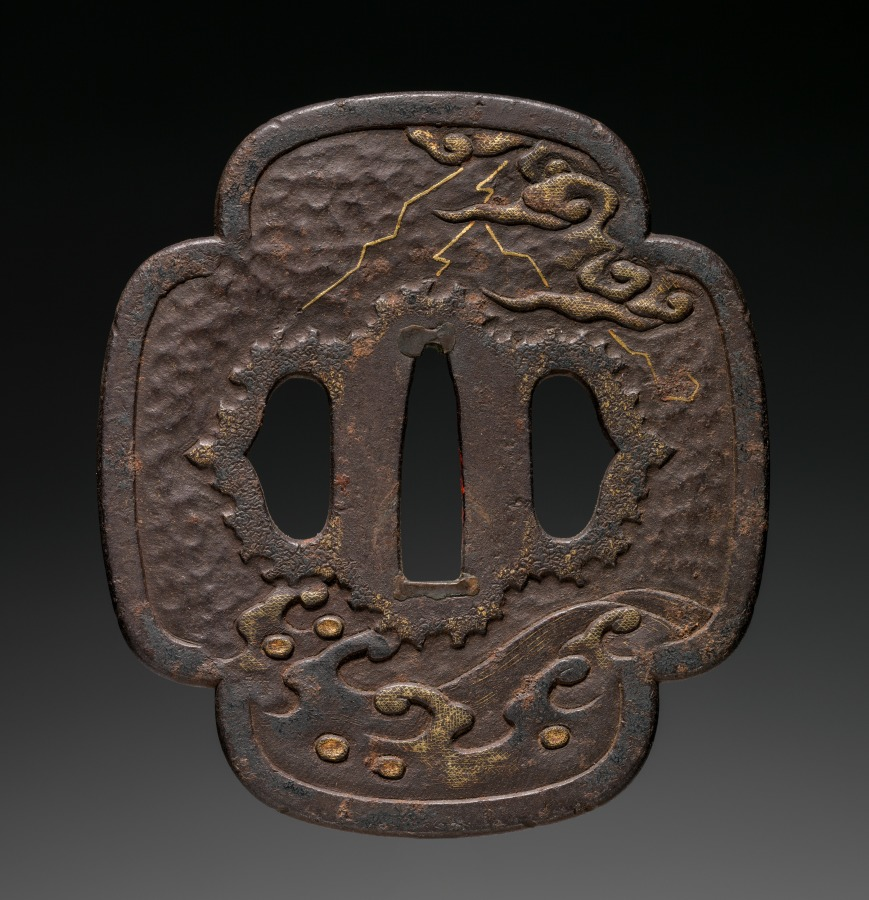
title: Sword Guard (Tsuba) with Dragon in Storm and Sea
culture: Japan, possibly Edo period (1615-1868)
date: c. 1615–1868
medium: iron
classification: Arms and Armor